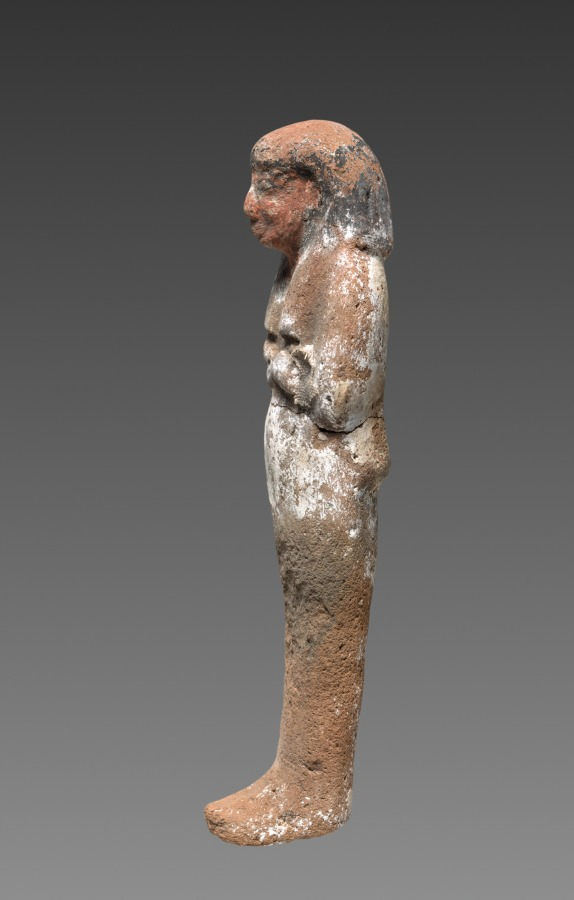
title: Shawabty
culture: Egypt, New Kingdom (1540–1069 BCE), Dynasties 19–20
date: 1295–1069 BCE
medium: terracotta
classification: Funerary Equipment